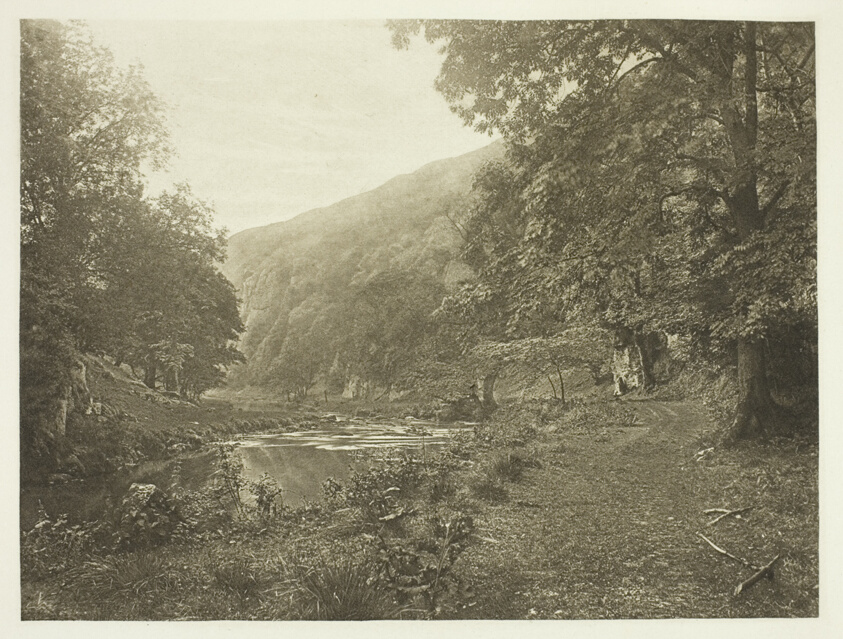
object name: Photograph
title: In Dove Dale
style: 19th century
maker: Peter Henry Emerson (English, born Cuba, 1856–1936)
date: 1880s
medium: Photogravure, plate XLIII from the album "The Compleat Angler or the Contemplative Man's Recreation, Volume II" (1888)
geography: England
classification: photogravure; photomechanical process; photography; photograph